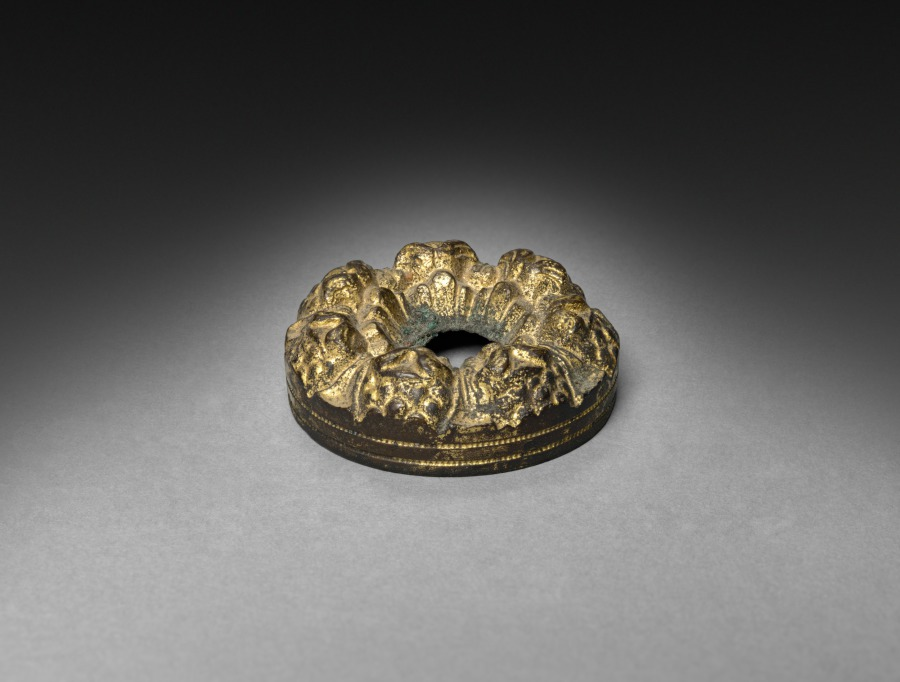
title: Inkwell (top to bottle)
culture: England or America, 19th century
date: 1825–1850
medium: gilt bronze and glass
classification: Metalwork